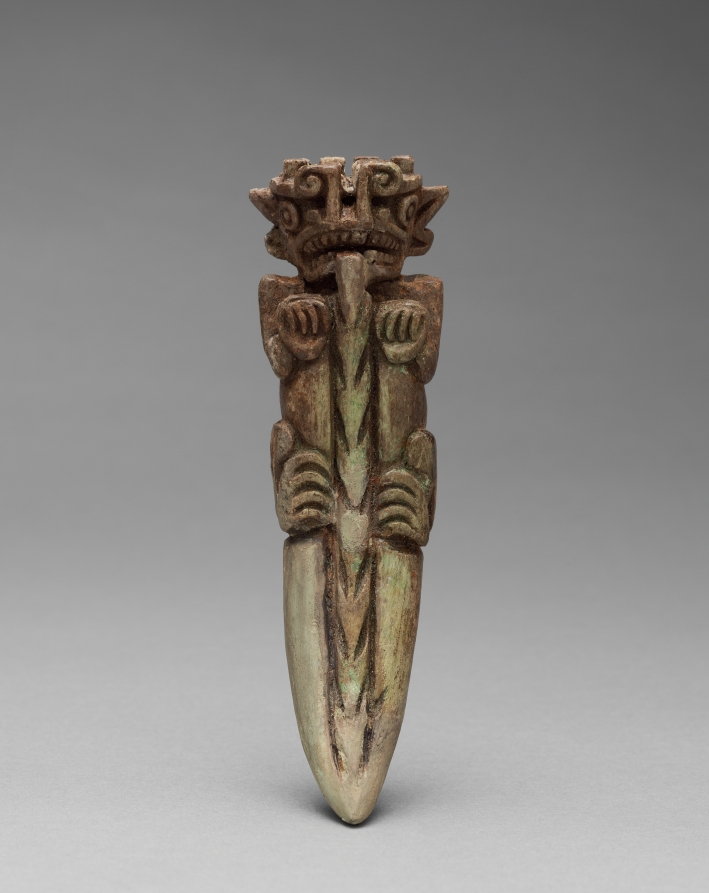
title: Ornament from Sitio Conte: Animal Pendant(?)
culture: Panama, Conte style, 5th - 10th century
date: c. 400–900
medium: manatee bone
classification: Jewelry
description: Harvard archaeologists excavated the eight ornaments in this case from several burials at Sitio Conte, a cemetery famous for its lavish graves of powerful chieftains. The young man buried in Grave 26 was such a chief. His status was stunningly memorialized by 21 human companions and 475 objects, many of them personal ornaments made of gold, including the large chest plaque (no. 2) and the rod-shaped ear ornament (no. 3) shown here. The creature on the chest plaque, found close to the chief’s body, has reptile claws and perhaps the head crest of an iguana. Its meaning is unknown but perhaps, as in later periods, reptilian imagery and the warm gleam of gold linked rulers with the sun’s creative force.